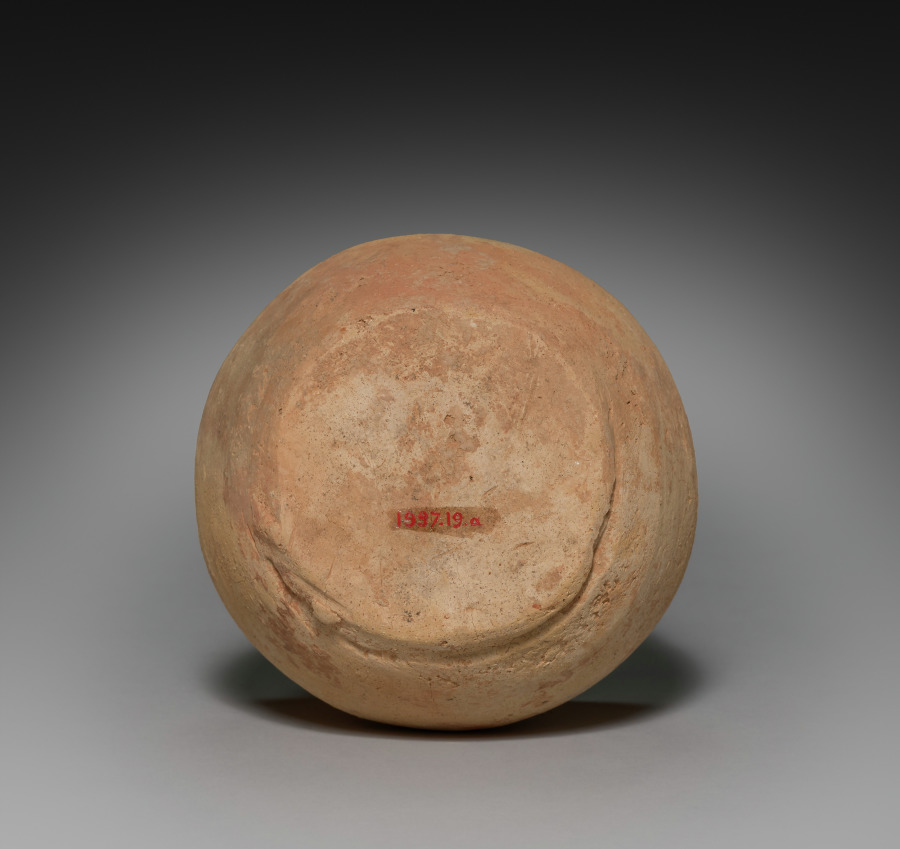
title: Covered Jar with Horn Handle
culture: Korea, Silla (57 BC-935) or Kaya (AD 42-562) period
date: 400s–500s CE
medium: red earthenware with applied red slip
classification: Ceramic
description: Early earthenware from the Three Kingdoms period (57 BCE–668) became widely utilized as agriculture and religion grew to be essential elements in sustaining society and its systems. The clay jars of different sizes and shapes on display were made for the following purposes: some were used to store harvested grains and seeds, some, especially lidded ones such as this example, to preserve cremated remains, and some to serve offerings in rituals.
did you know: Closed kilns built on hillsides became widely used for producing this type of pottery vessel in Korea during the Three Kingdoms period.